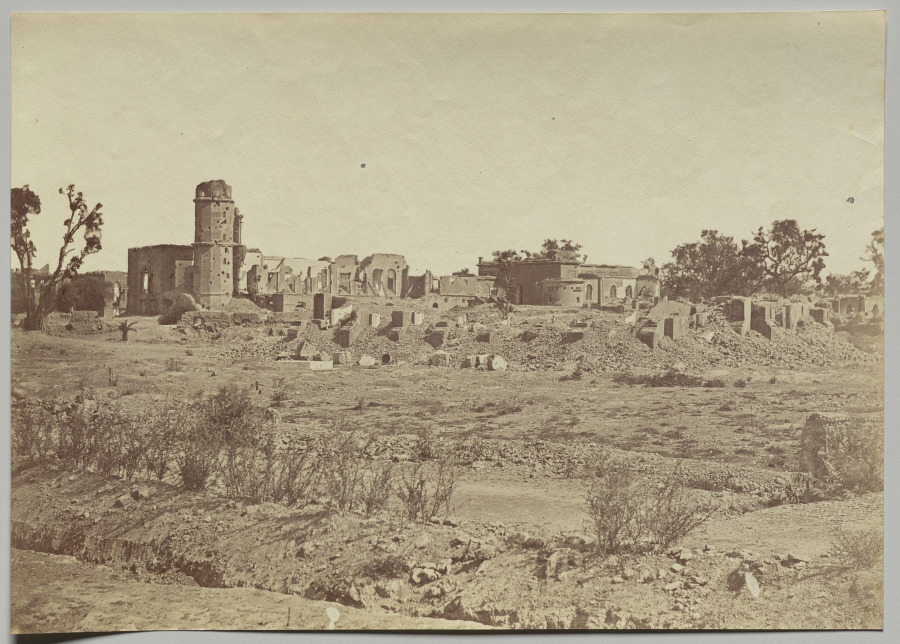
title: The Churchyard and Residency in the Distance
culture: England, 19th century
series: Lucknow After the Siege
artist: Felice A. Beato (British, 1832–1909)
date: 1858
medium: albumen print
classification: Photograph